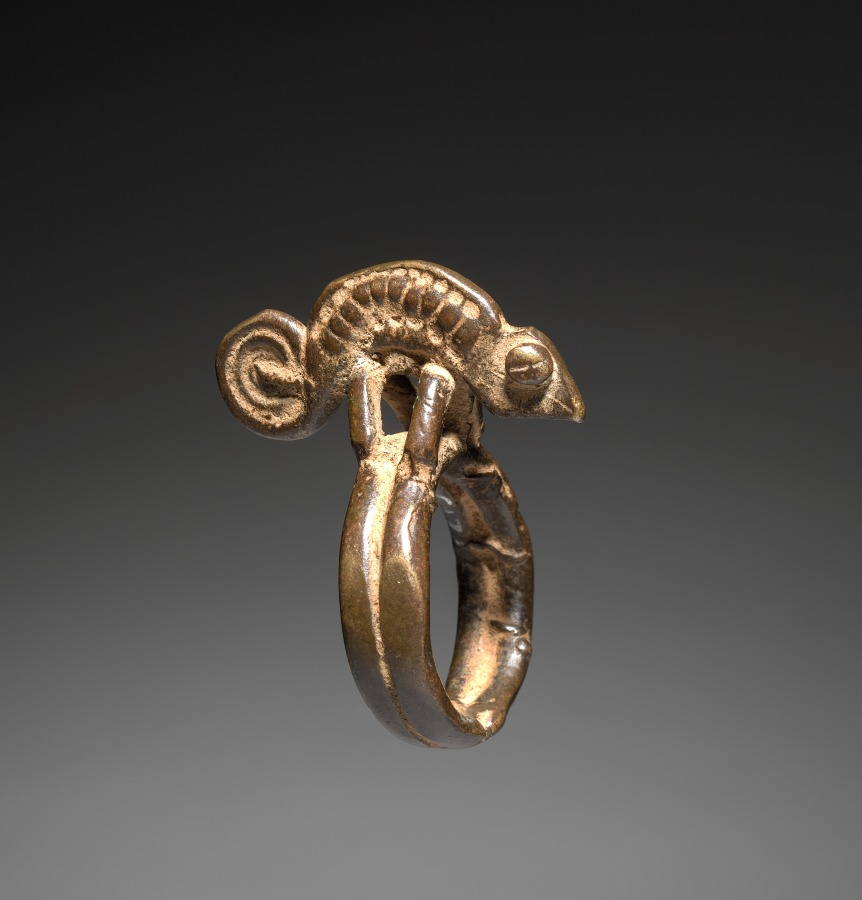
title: Ring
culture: Africa, West Africa, Côte d'Ivoire, Senufo style, unknown maker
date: before 1975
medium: Copper alloy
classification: Jewelry